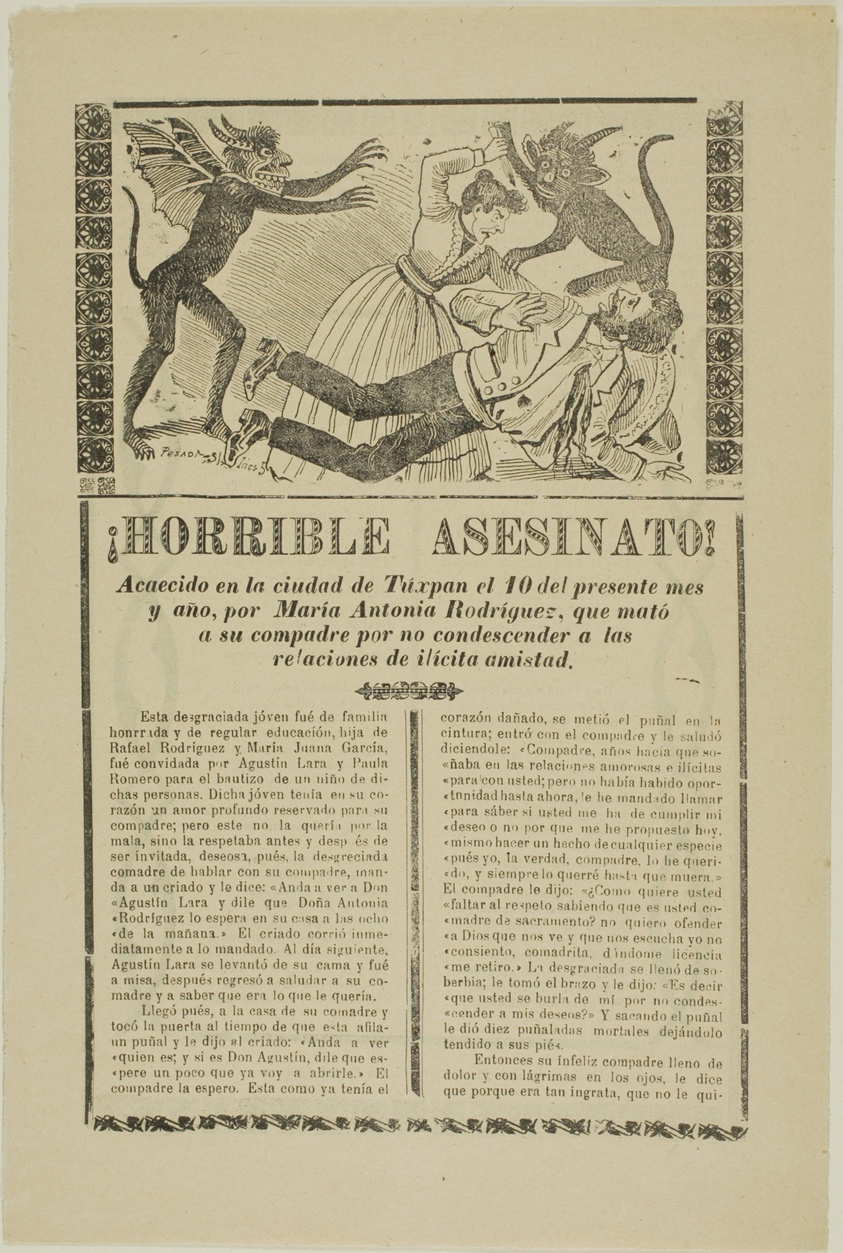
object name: Print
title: Horrible Murder!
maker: José Guadalupe Posada (Mexican, 1852-1913)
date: c. 1910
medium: Photo-relief etching on tan wove paper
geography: Mexico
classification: relief etching; print; prints and drawing